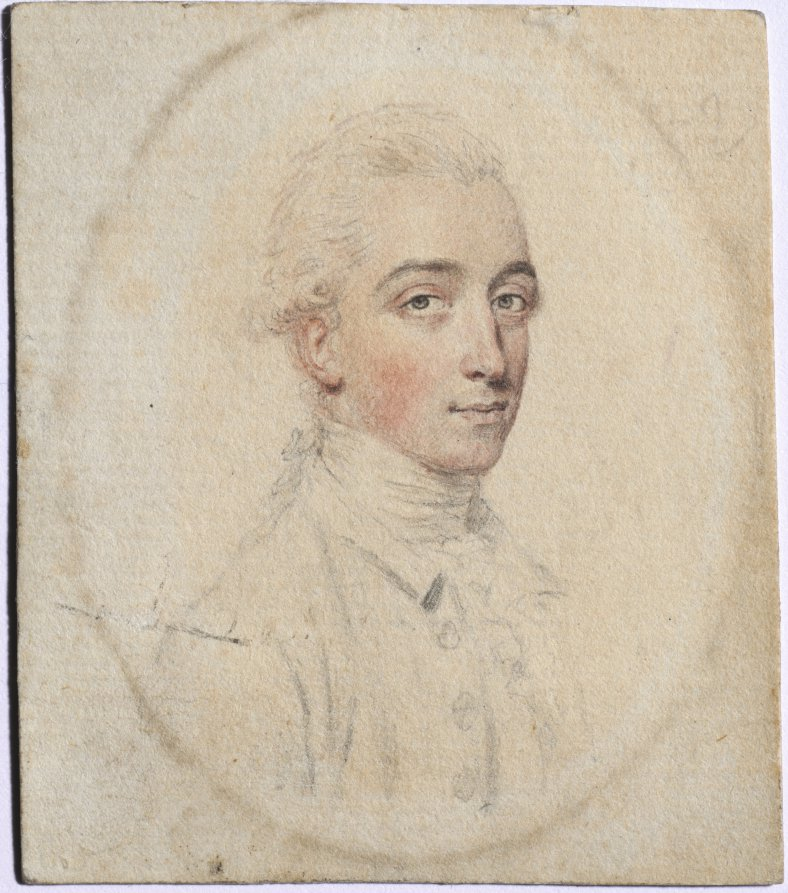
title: Portrait of Mr. Gambier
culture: England, 18th century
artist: John I Smart (British, 1741–1811)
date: c. 1776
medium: graphite and wash on laid paper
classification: Portrait Miniature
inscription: Signature: none; inscribed in graphite on front of paper at upper right corner: [?][?]2; inscribed on paper backing: in graphite, upside down at upper left: 15; in graphite, on a slant at left center to upper right: Mr. Fitzherbert; inscribed on back of paper in graphite: Mr. [Gambier]; inscribed in brown ink: Gambier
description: Although it is impossible to say if it was always part of the artist’s process to execute a preparatory sketch prior to painting each miniature, we do know that John Smart retained many hundreds of these sketches. A group of preparatory sketches—of which this portrait is one—descended through the Smirke family after Smart’s daughter Sarah gave a sketchbook containing preparatory portrait studies to her friend Mary Smirke, sister of the celebrated Victorian architect Sydney Smirke. This book was probably broken up around 1877 when it was divided between Sydney’s daughters Mary Jemmett and Mrs. Lange, whose portions were both sold at auction in 1928. G. C. Williamson was the first to suggest that Smart’s sketches were well known and that they were preparatory studies for the painted miniatures. Williamson listed the names of sitters from the sketches known to him at the time, and they include Mr. Fitzherbert, the identification formerly given to the sitter in this portrait. Here, the sitter’s head and shoulders are facing left. He has brown eyes and wears his powdered hair en queue. His coat has a narrow collar, under which he wears a high stock collar and frilled vest. The color of his attire is not suggested, and the background remains unpainted. Though long catalogued as Mr. Fitzherbert, the portrait was likely mistakenly designated as such at a later date. There has been confusion regarding several miniatures called Mr. Fitzherbert, which may or may not be related. There was a sketch of a different Mr. Fitzherbert in the Jemmett sale of February 29, 1928; another in the Burton-Jones collection by the 1940s; and a miniature of a Mr. Fitzherbert portrayed nearly full face and dated 1771 was sold at Sotheby’s, London, on August 1, 1934 (lot 73). The present location of these unpublished miniatures is unknown, as is their credibility as portraits of the Mr. Fitzherbert that Smart is known to have painted. When the paper backing of the Cleveland miniature was removed in 1993, the name Gambier was discovered inscribed in graphite and pen on the back. This miniature relates to a portrait of a man on ivory dated 1774, formerly in the Ashcroft collection and at one time on loan to the Victoria and Albert Museum. It was sold at Sotheby’s, London, on May 7,1946 (lot 61) and catalogued as a “miniature of a young man, by John Smart, signed and dated, head and shoulders three-quarters sinister, gaze directed at spectator, fair hair en queue, in white cravat, frilled vest and rich red coat, 1 3/8 in.” The size of the portraits correspond, though the ivory miniature represents less of the figure than is seen in the sketch and is therefore smaller. While the color red for the coat is not indicated in the sketch, Smart often left the dress of his male sitters plain in preparatory sketches. Thus, this currently unlocated miniature on ivory can be identified as Mr. Gambier. Research into the identity of this gentleman is ongoing.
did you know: Sketches helped John Smart work out the particulars of a portrait before commencing the miniature on ivory; they were useful in the event that a duplicate might later be required.